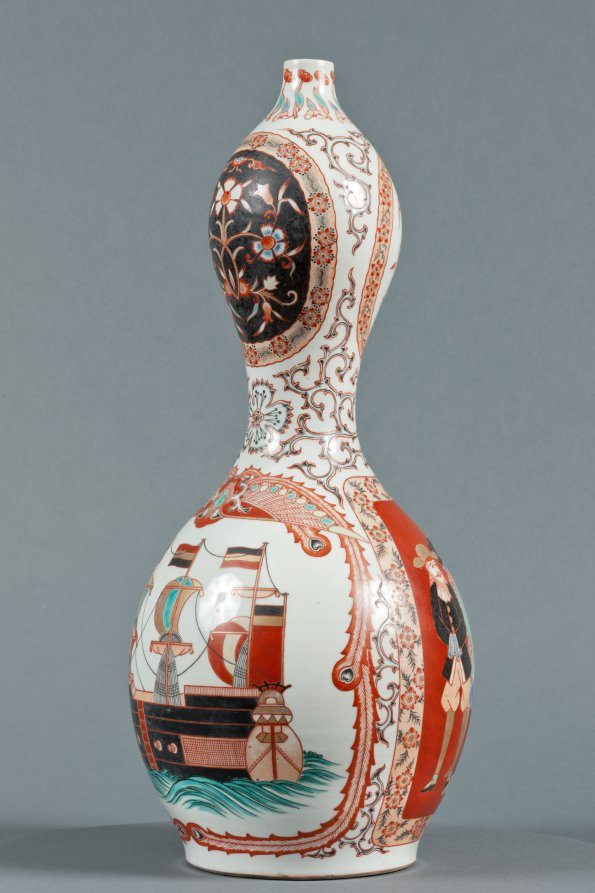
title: Bottle with Western Ships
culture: Japan, Edo period (1615–1868)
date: c. 1800–1868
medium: Porcelain with decoration in colored enamels and underglaze blue, overglaze enamels, and gold (Hizen ware, Arita type)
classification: Ceramic